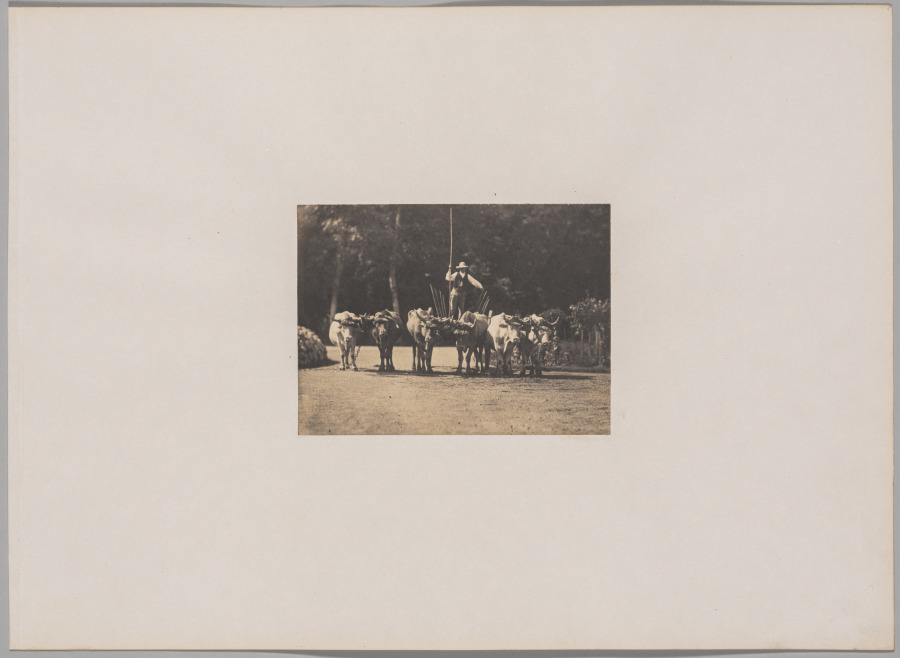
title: Six Oxen Team with their Driver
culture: France, 19th century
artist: Olympe Aguado (French, 1827–1894)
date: c. 1853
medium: salt print from wet collodion negative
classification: Photograph